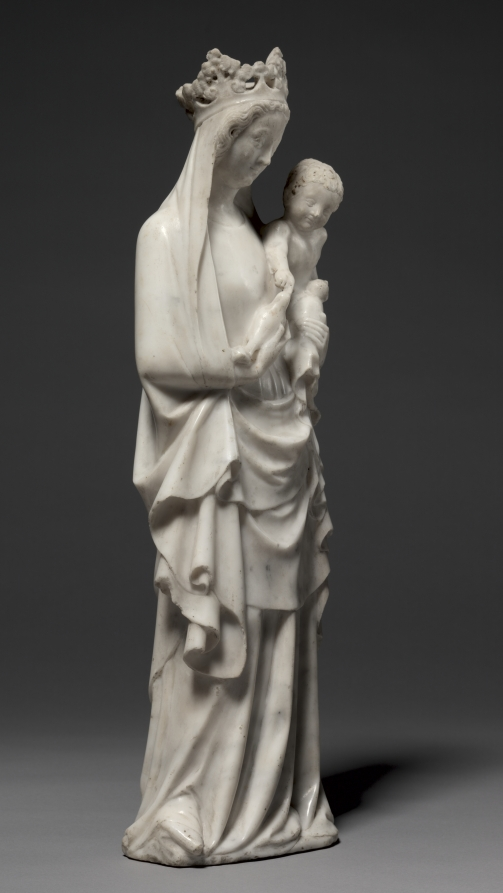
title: Virgin and Child with a Bird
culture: France, Île-de-France, Paris, 14th century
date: c. 1350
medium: marble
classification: Sculpture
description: The Virgin and Child represents one of the most frequent subjects for free-standing sculpture in 14th-century France, motivated by the developing cult of the Virgin and increasing veneration of Mary. Such sculptures were not restricted to churches, but were also found in roadside shrines, entrances to towns, and domestic use in private chapels. The small scale of this statuette suggests it was made for private veneration. The bird, held in the Virgin’s right hand, was a well-known symbol of the human soul and represents Christ’s role as redeemer of humankind.